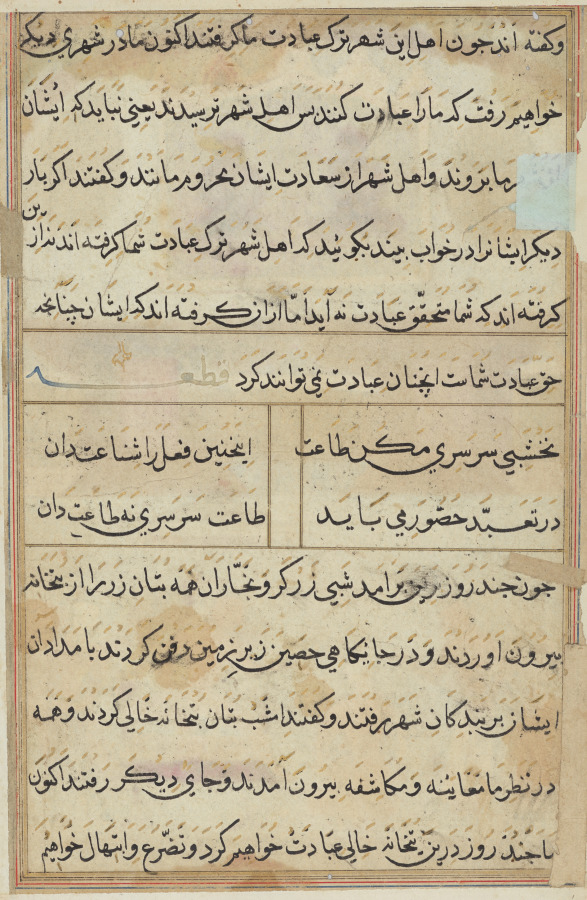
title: Page from Tales of a Parrot (Tuti-nama): text page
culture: Mughal India, court of Akbar (reigned 1556–1605)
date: c. 1560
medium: gum tempera, ink, and gold on paper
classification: Painting